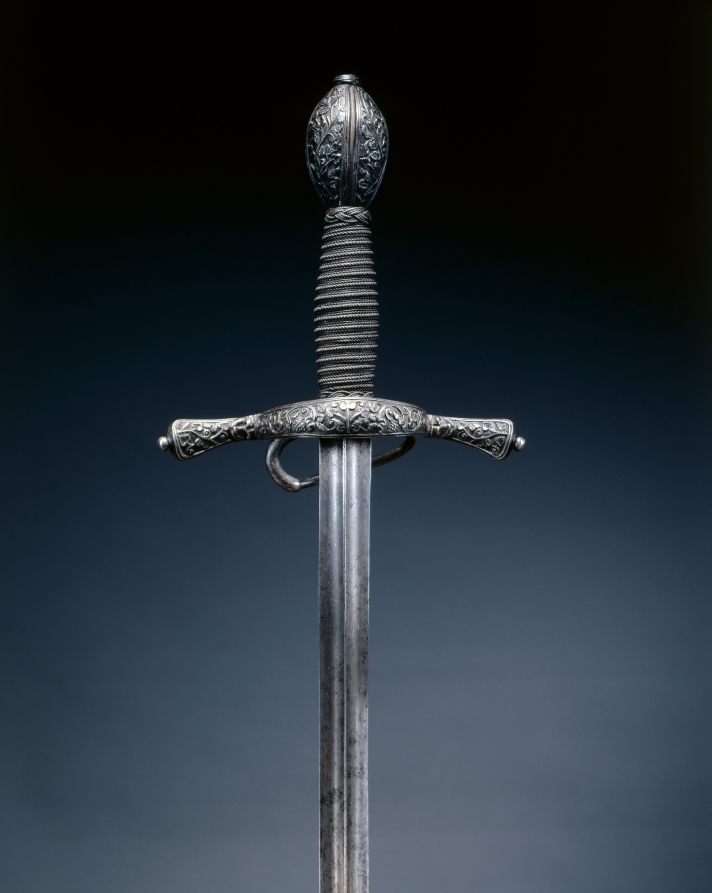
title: Rapier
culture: Italy, early 17th Century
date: c. 1600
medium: steel, wire grip; hilt blued and chiseled with foliate pattern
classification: Arms and Armor